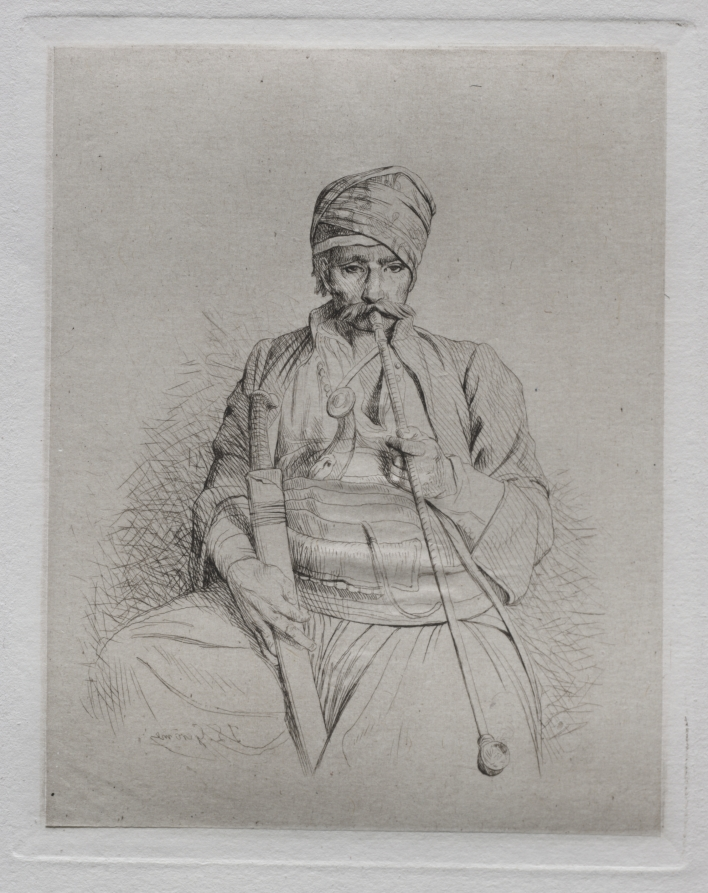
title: Egyptian Smoker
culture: France, 19th century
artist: Jean-Léon Gérôme (French, 1824–1904)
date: c. 1865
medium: etching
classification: Print